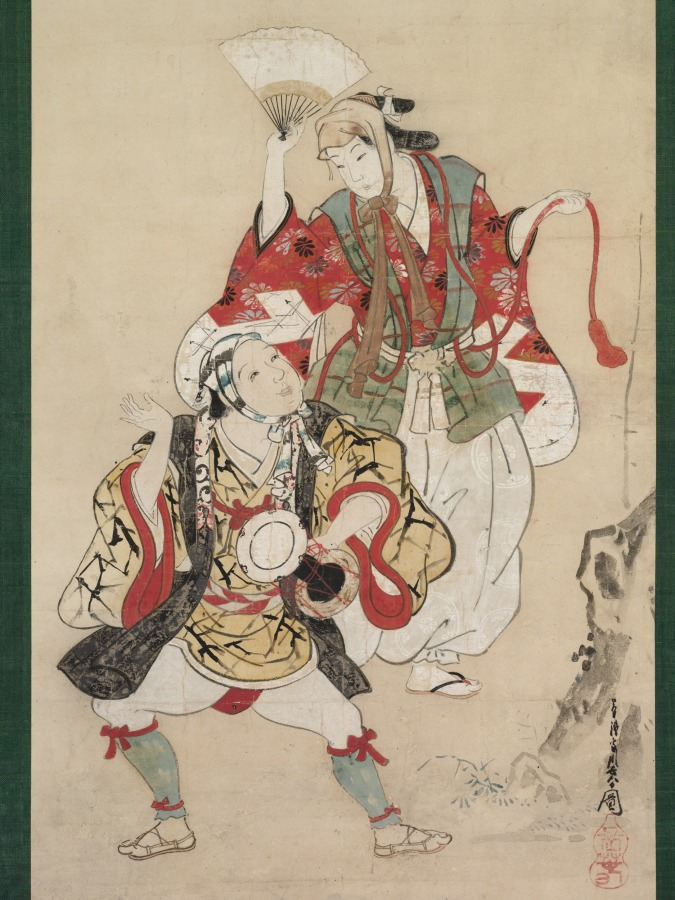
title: Spring Dancers (Manzai)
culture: Japan, Edo period (1615–1868)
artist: Miyagawa Chōshun (Japanese, 1683–1753)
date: early to mid-1700s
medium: hanging scroll; ink and color on paper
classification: Painting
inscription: Artist's signature and gourd-shaped seal lower right corner.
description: Manzai is the Japanese term for wandering comic dancers. The painting depicts one of the traditional pleasures of the spring season.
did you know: One performer is playing a hand-held drum, like CMA 1918.349.